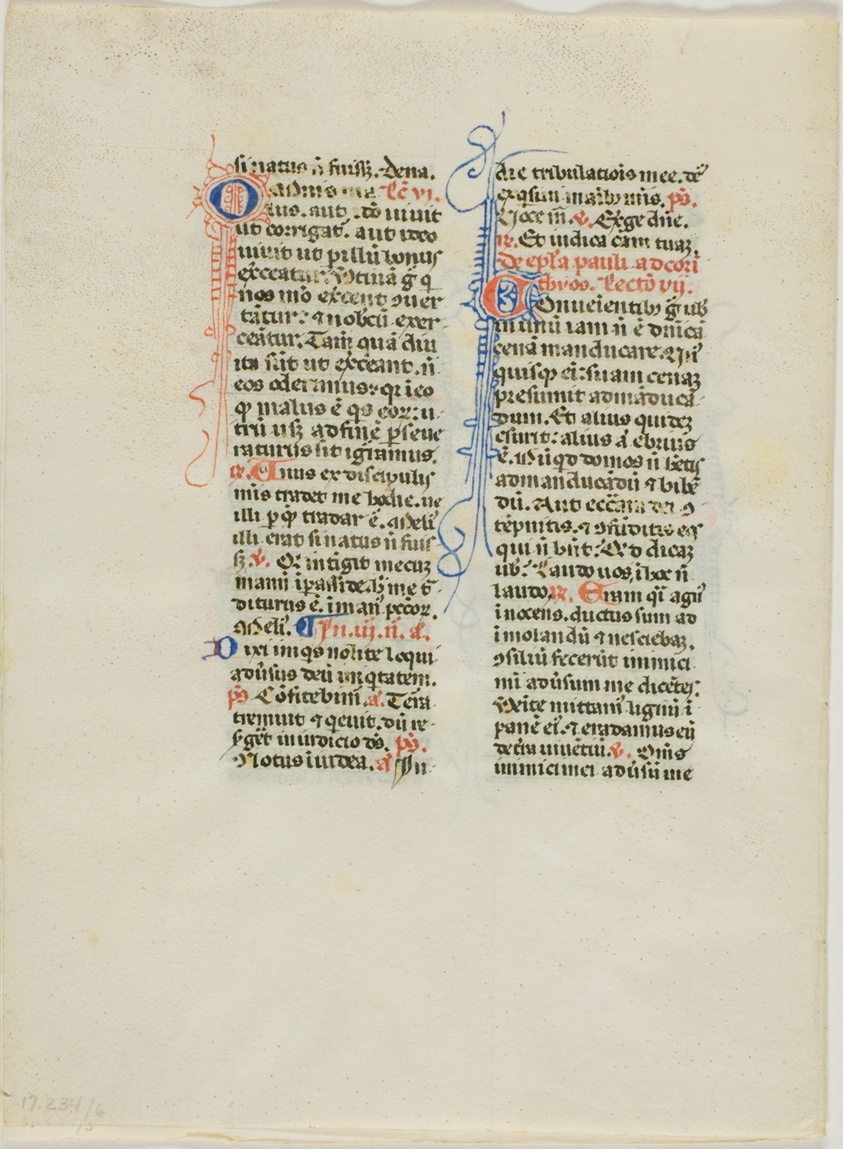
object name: Drawing and Watercolor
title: Illuminated Manuscript Leaf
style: medieval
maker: Italian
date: c. 1450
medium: Manuscript cutting with round gothic inscriptions in black, red and blue inks, and decorations in red and blue inks, on vellum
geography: Italy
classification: pen and ink drawings; manuscript; drawings (visual works); prints and drawing